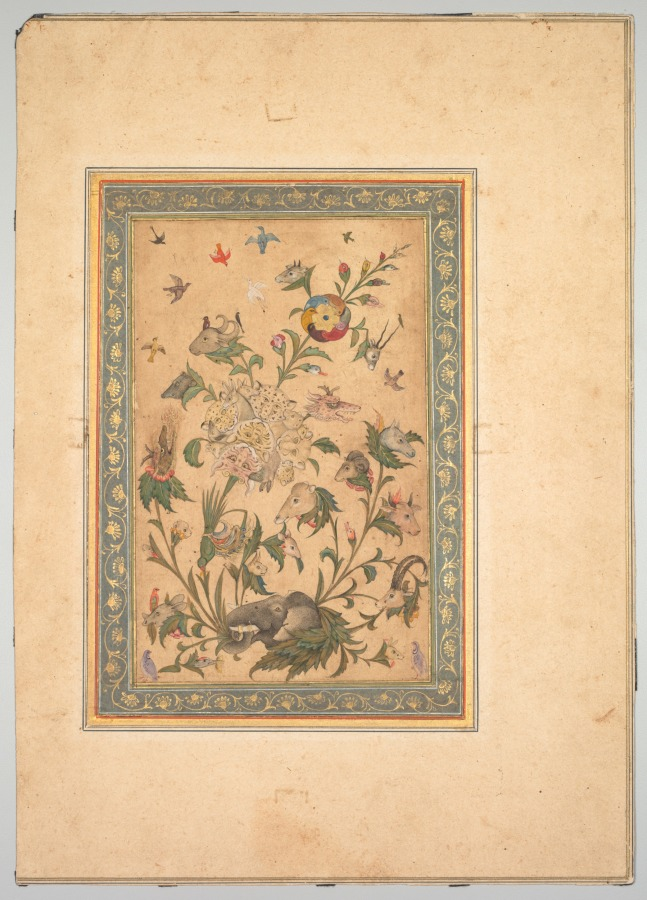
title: A floral fantasy of animals and birds (Waq-waq)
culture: Mughal India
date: early 1600s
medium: Gum tempera and gold on paper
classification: Painting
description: A magical plant simultaneously brings forth and eats animal life in multiple forms. Playfully rendered, real and mythic creatures ripen on the vine. All stems issue from the elephant, who is about to eat the main branch, while he, in turn, emerges from one that is about to be cut by the teeth of an ibex at the lower right. This painting would have beguiled courtly connoisseurs who enjoyed discovering visual puns in a royal album. Learned viewers would note that an animal-bearing plant recalls medieval Persian stories about the mythical island of Waq-waq, inhabited by half-plant/half-animal creatures.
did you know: The dragon threatens to singe the boar’s beard.